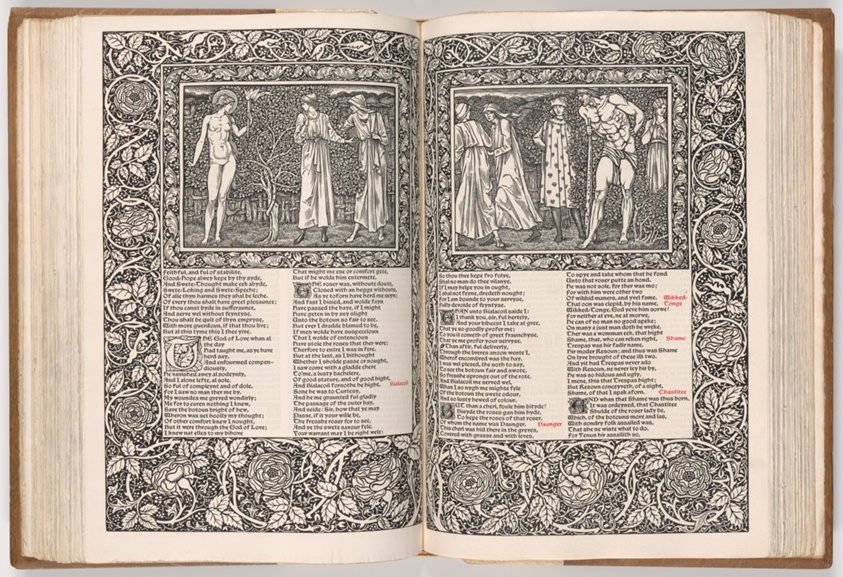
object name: Book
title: The Works of Geoffrey Chaucer Now Newly Imprinted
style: Arts and Crafts Movement, 19th century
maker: William Morris (English, 1834–1896); Illustrated by Sir Edward Burne-Jones (English, 1833-1898); Engraved by William Harcourt Hooper (English, 1834-1912)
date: 1896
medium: Hand-printed book on Batchelor linen paper, bound with tooled white pigskin on oak board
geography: England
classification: book; ink on paper